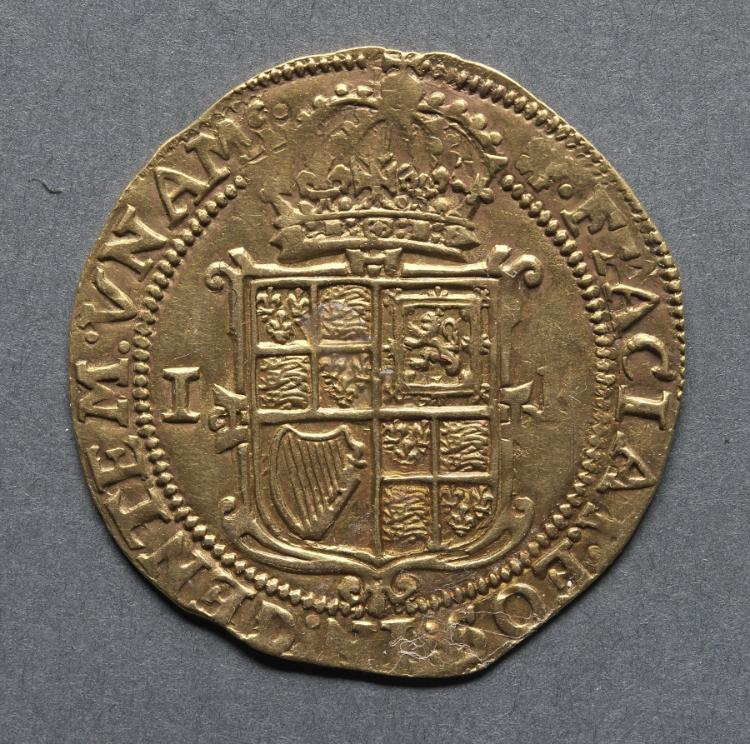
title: Unite: Shield of Arms (reverse)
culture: England, James I, 1603-1625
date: 1613–1615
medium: gold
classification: Coins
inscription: FACIAM EOS IN GENTEM VNAM